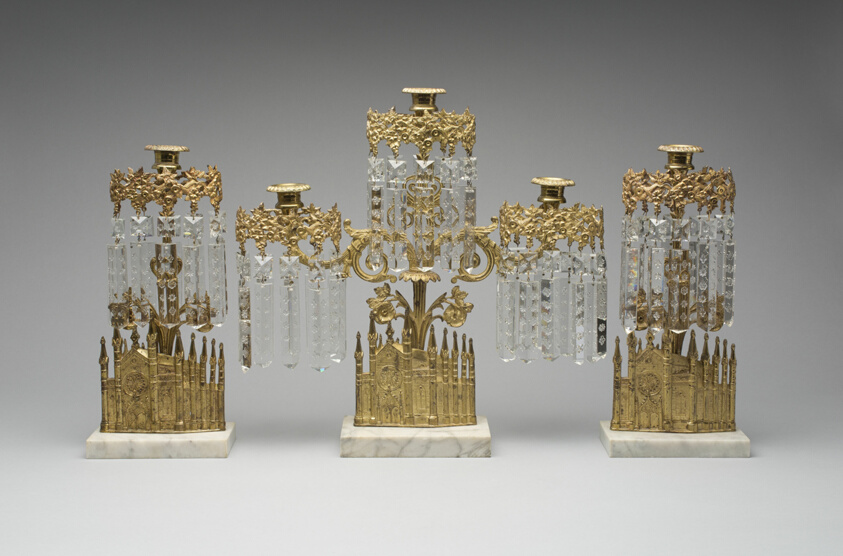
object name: Decorative Arts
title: Girandoles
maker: William F. Shaw (American, 1820–1900)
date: designed 1849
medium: Gilt brass, glass, and marble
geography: United States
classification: candleholder; american decorative arts; decorative arts